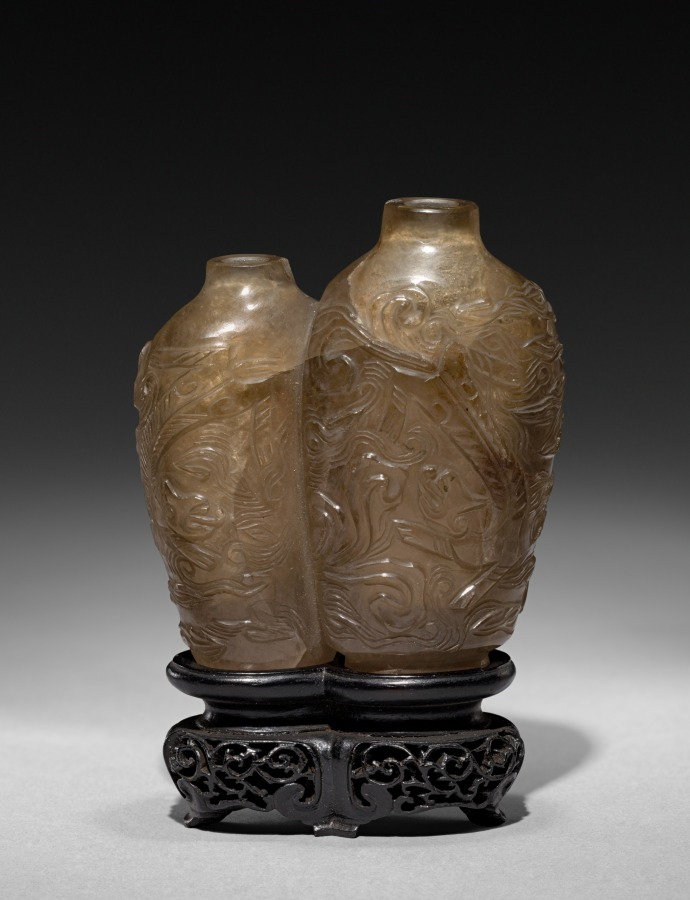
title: Snuff Bottle - Double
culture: China, Qing dynasty (1644-1911)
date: 1644–1911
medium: glass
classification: Glass